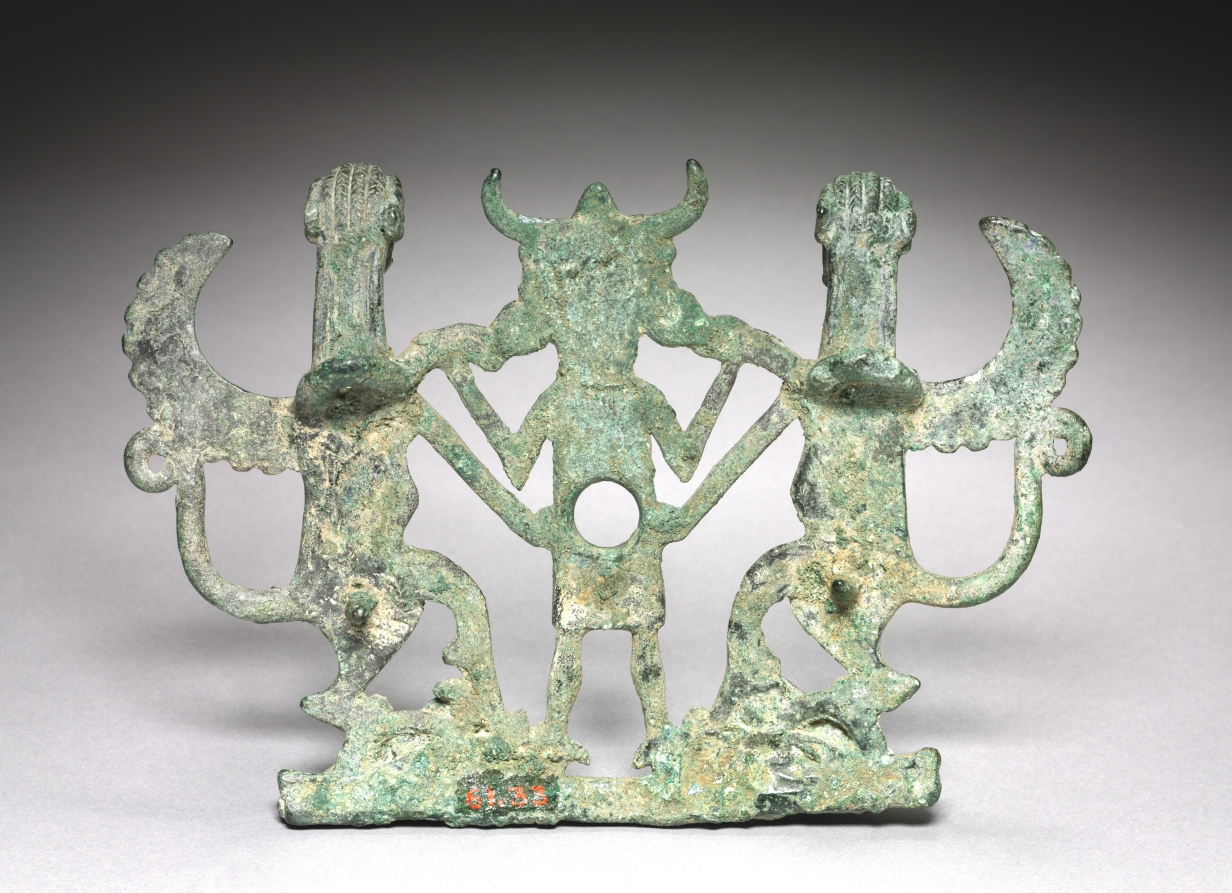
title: Master of Animals Cheekpiece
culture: Iran, Luristan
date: c. 700 BCE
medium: bronze, cast and incised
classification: Metalwork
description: In this cast bronze cheekpiece, a horned male figure with sidelocks grabs two winged felines by their forelegs. Each feline tramples a rabbit beneath its feet. This design is an ancient Near Eastern motif known as the Master of Animals. Incised chevrons, lines, and crosses decorate the master and the winged felines. A ring penetrating the male figure’s torso provides a means of attachment for a metal horse bit, now missing, and a second cheekpiece, likely nearly identical. This work likely originates from Luristan, a region in northwestern Iran known for its metalworking and horse-breeding in the Iron Age.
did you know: The Master of Animals may represent a god of nature or the hunt.